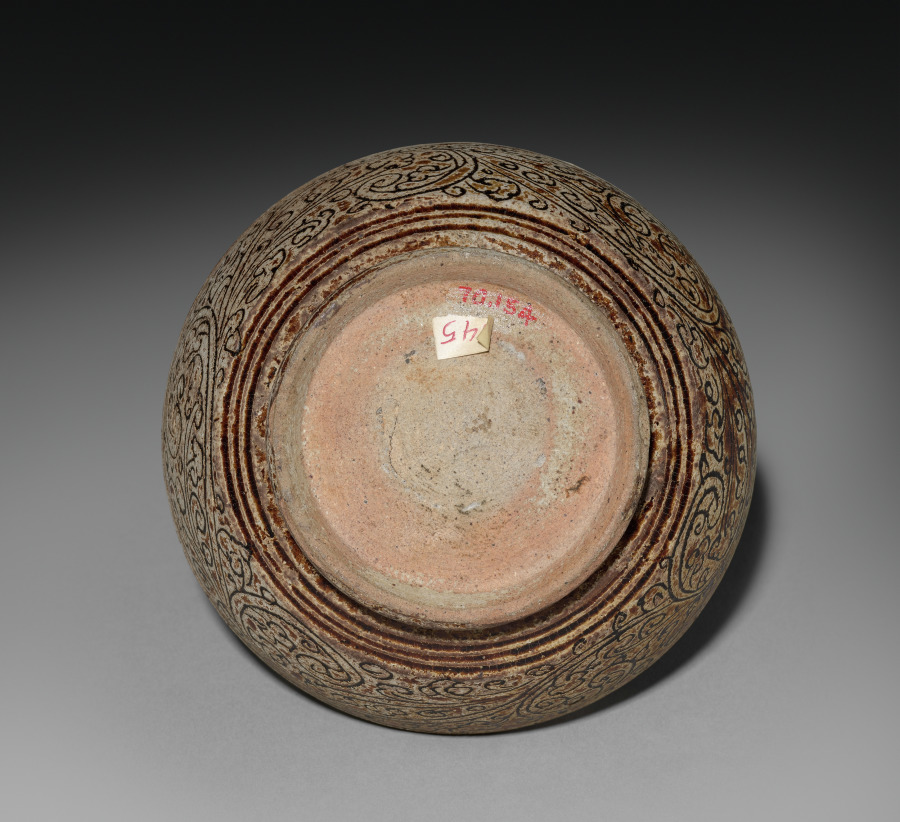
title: Covered Jar, Sawankhalok ware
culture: Thailand, Sukhothai Period, 14th century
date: 1300s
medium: pottery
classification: Ceramic